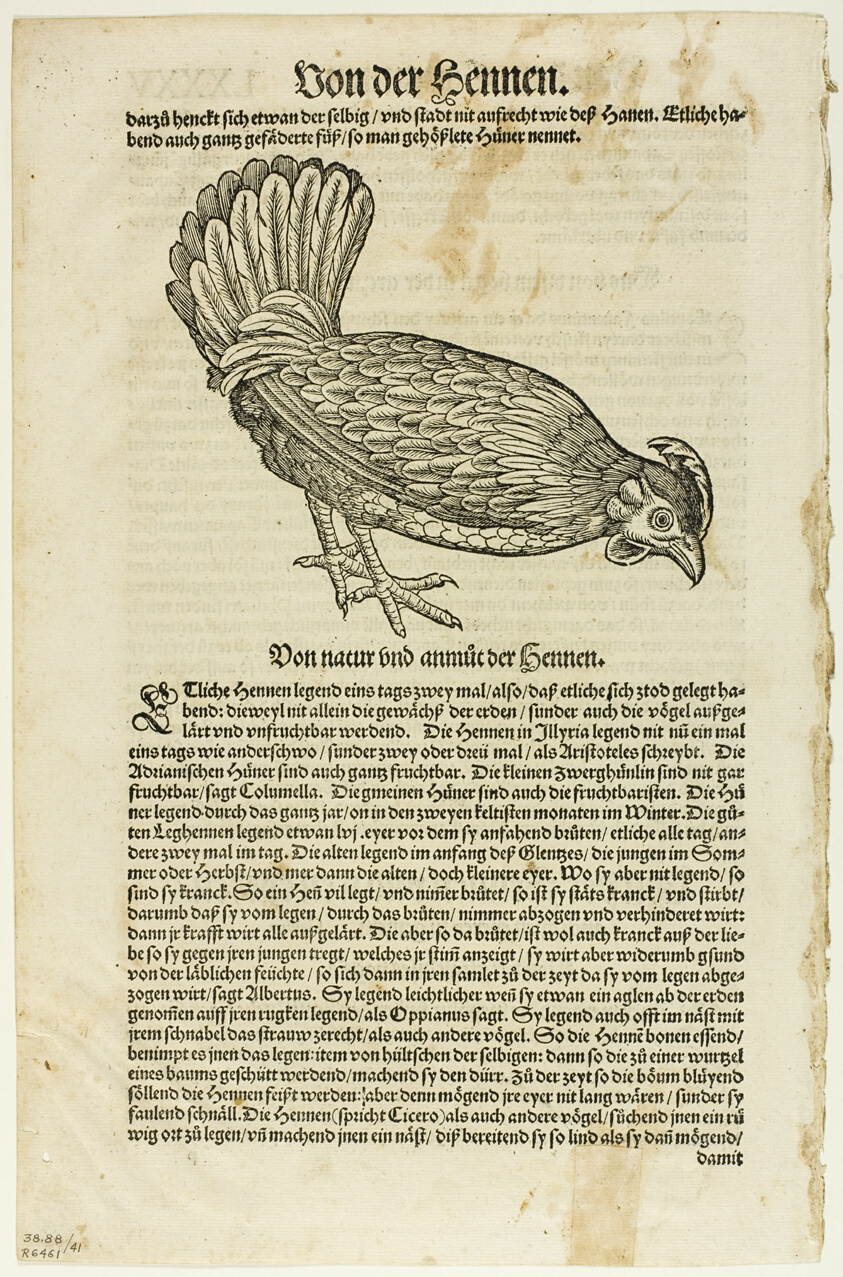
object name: Print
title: Illustration from "Vogelbuch", plate 41 from Woodcuts from Books of the XVI Century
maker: Unknown Artist (Swiss, 16th century); assembled by Max Geisberg (Swiss, 1875-1943)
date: 1557, assembled into portfolio 1937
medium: Woodcut on paper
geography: Switzerland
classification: woodcut; print; prints and drawing